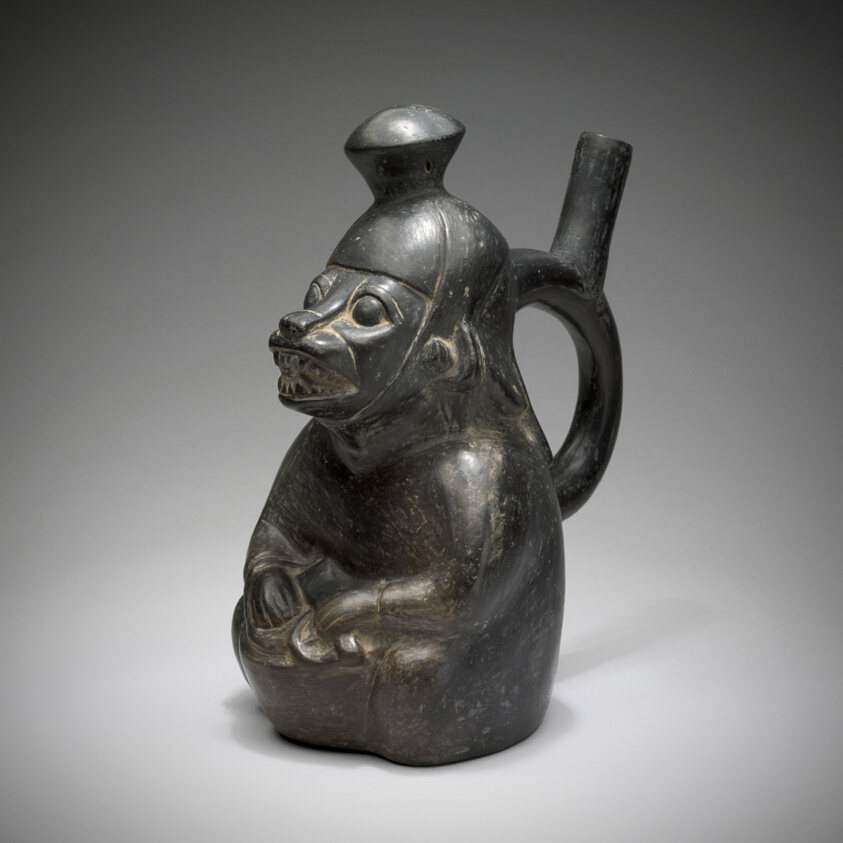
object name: Vessel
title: Vessel in the Form of a Masked Drummer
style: moche, americas, andes, Arts of the Americas, andean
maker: Moche (Chimbote, Santa Valley, north coast, Peru)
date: 100 BCE–500 CE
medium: Ceramic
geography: Santa Valley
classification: earthenware; ceramics; vessel; art of the americas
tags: musicians, figures (representations), masks